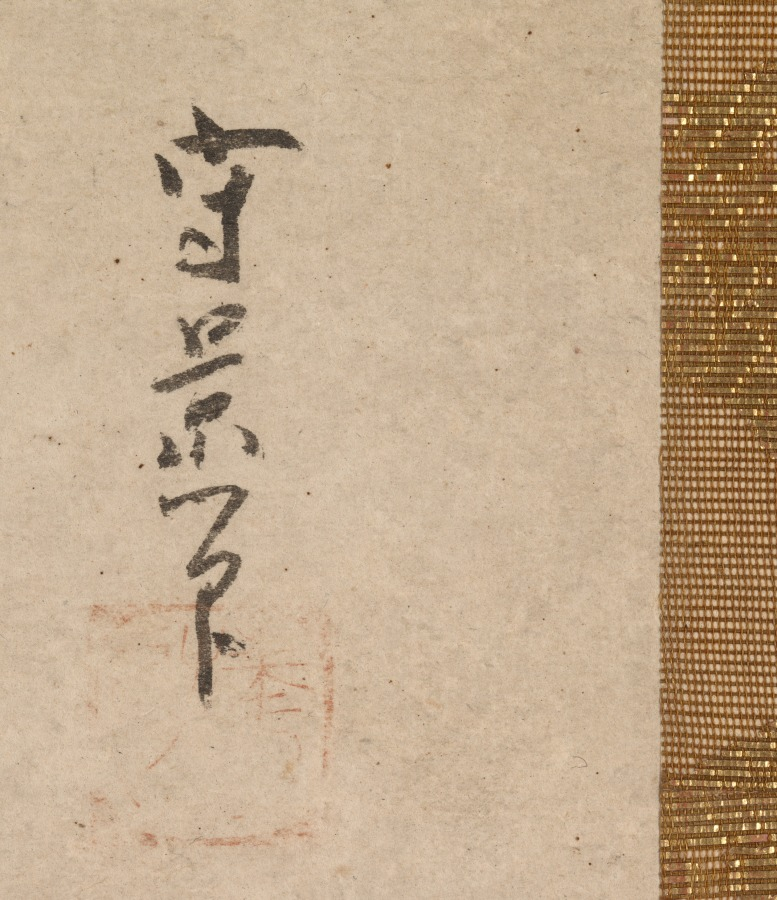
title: A Samurai on Horseback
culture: Japan, Edo period (1615–1868)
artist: Kusumi Morikage (Japanese, active c. 1620–1690)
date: mid- to late 1600s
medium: hanging scroll; ink and slight color on paper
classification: Painting